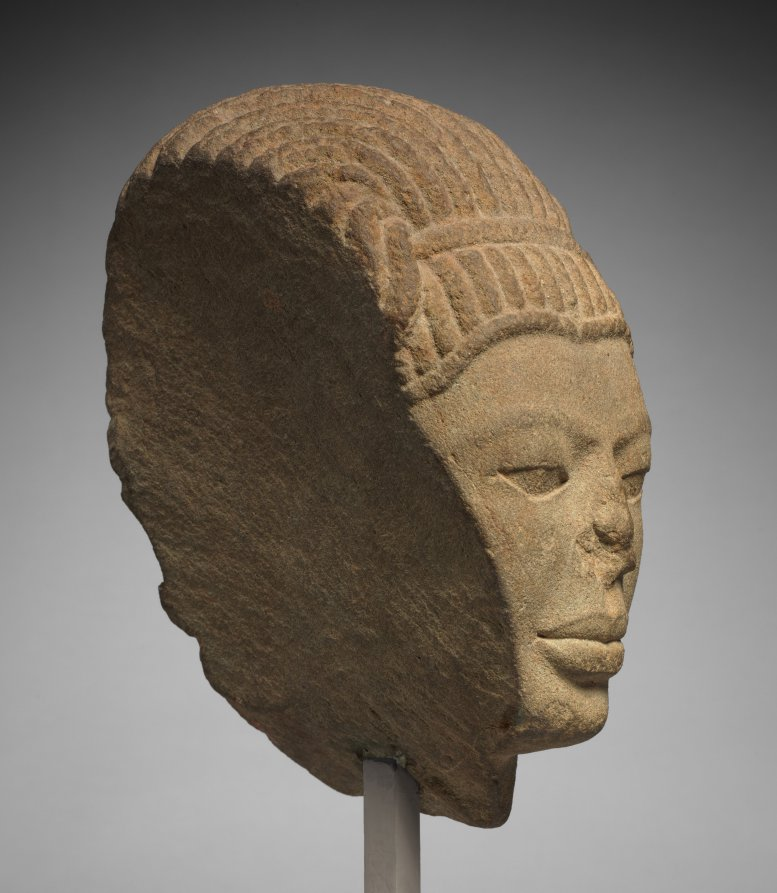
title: Head of Male Deity, possibly Aiyanar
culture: Central Thailand, Phetchabun province, possibly Si Thep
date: 600–650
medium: sandstone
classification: Sculpture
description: The dreadlocks suggest that this figure is related to the Hindu god Shiva, and the sensitive rendering of the facial features indicates that it was carved during the early phase of stone sculpture production in Thailand. A more complete sculpture of another male figure with dreadlocks and youthful features is known from Thailand and shows him seated with one knee up, supported by a yoga strap. In South India, a deity of this description is worshiped as a guardian on the outskirts of villages on the banks of ponds and reservoirs, known as Aiyanar, which means "Lord" in the Tamil language. Alternatively, this figure could be an ascetic, or follower of Shiva.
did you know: This figure may depict a deity who protects travelers on their way.